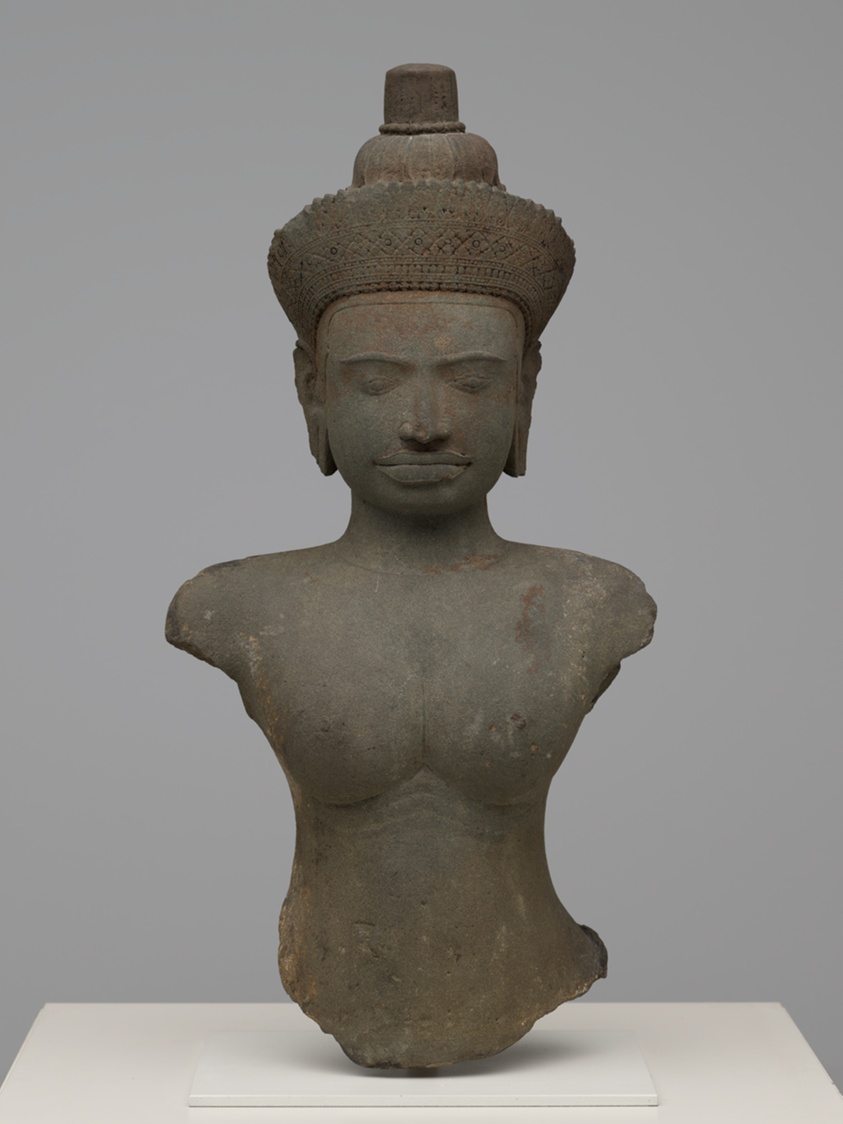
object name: Sculpture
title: Bust of a Female Deity (Devi)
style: Southeast Asian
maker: Cambodia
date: Angkor period, 10th/11th century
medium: Sandstone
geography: Cambodia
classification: stone (unidentified); stone; sculpture; asian art